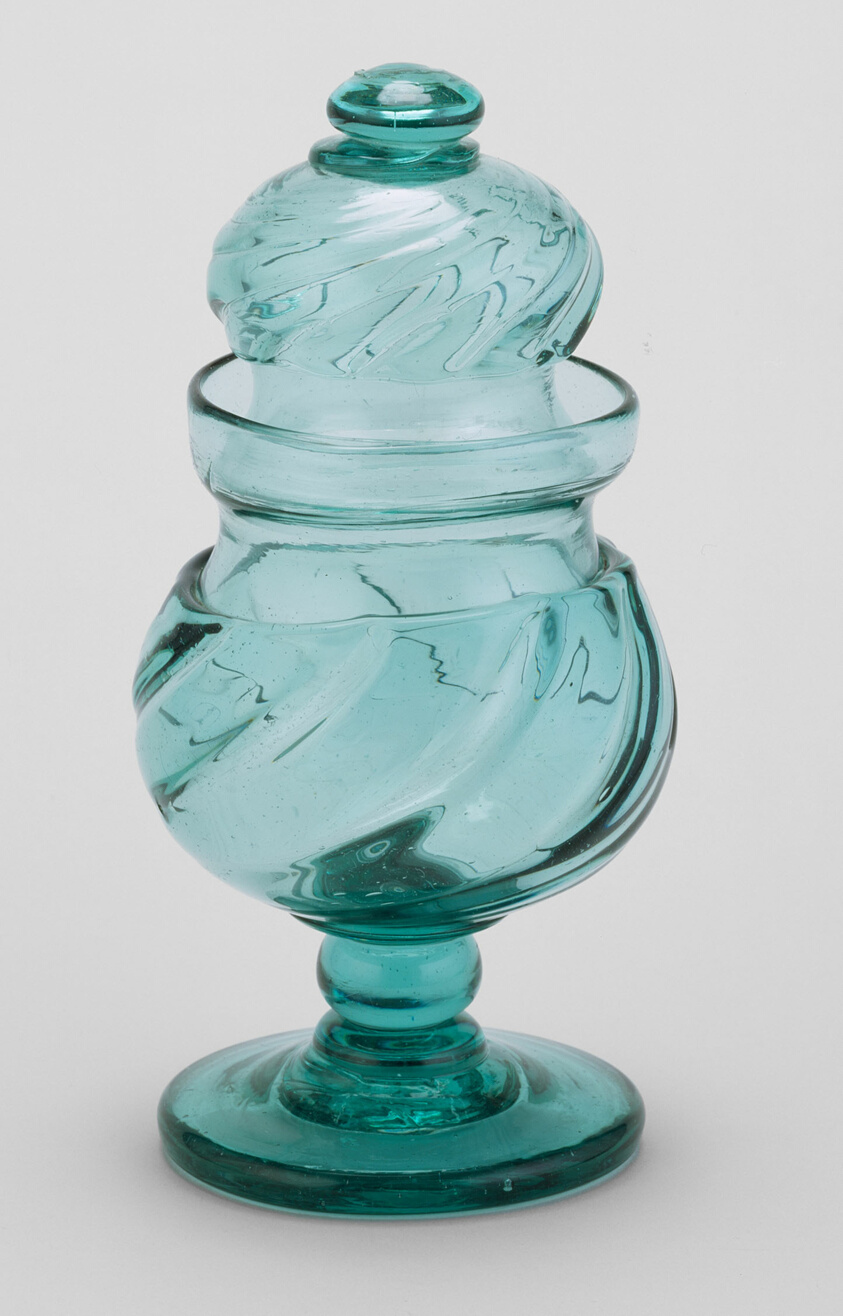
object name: Glass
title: Covered Sugar Bowl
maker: Artist unknown (American, 19th century); Mid-Atlantic or New England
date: 1835–55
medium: Blown glass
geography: Middle Atlantic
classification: sugar bowl; glass; american decorative arts; american arts; decorative arts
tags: dining, drinking